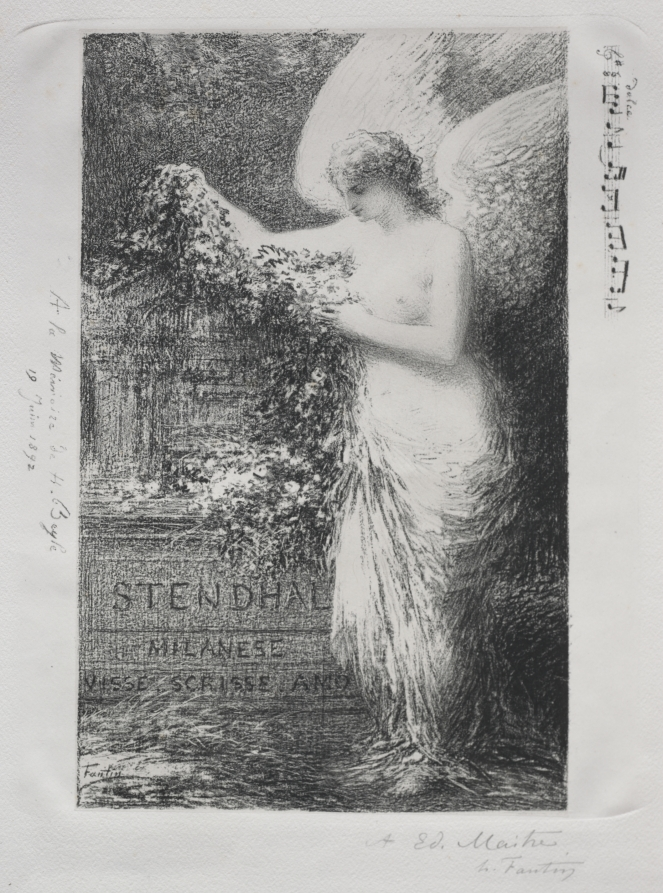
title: À Stendhal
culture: France, 19th century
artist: Henri Fantin-Latour (French, 1836–1904)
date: 1892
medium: lithograph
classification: Print